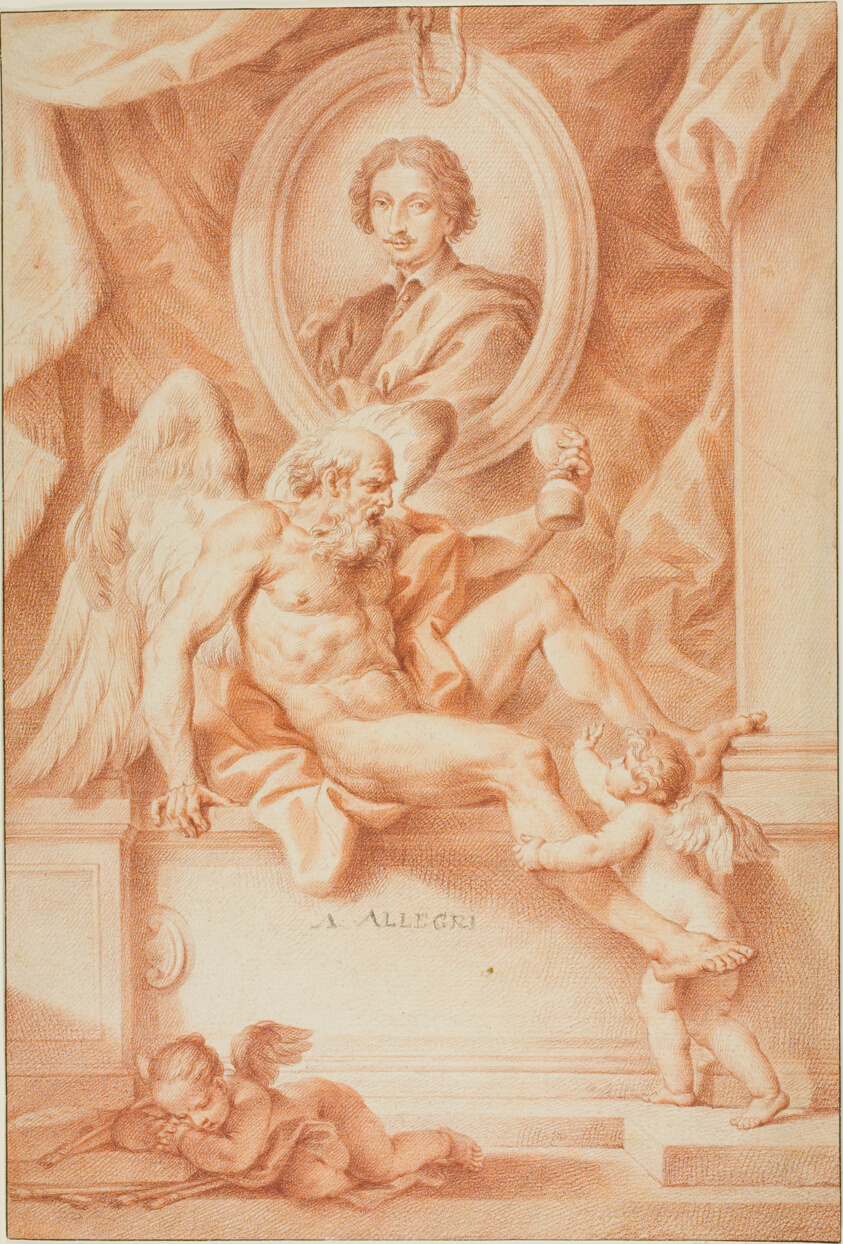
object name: Drawing and Watercolor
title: Allegory of Time in Honor of a Painter (Claude Lorrain?)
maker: Attributed to Francesco Bartolozzi (Italian, 1727-1815); after Carlo Maratti (Italian, 1625-1713)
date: 1675-1750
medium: Red chalk, with traces of black chalk and graphite, on ivory laid paper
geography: Italy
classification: chalk; drawings (visual works); prints and drawing